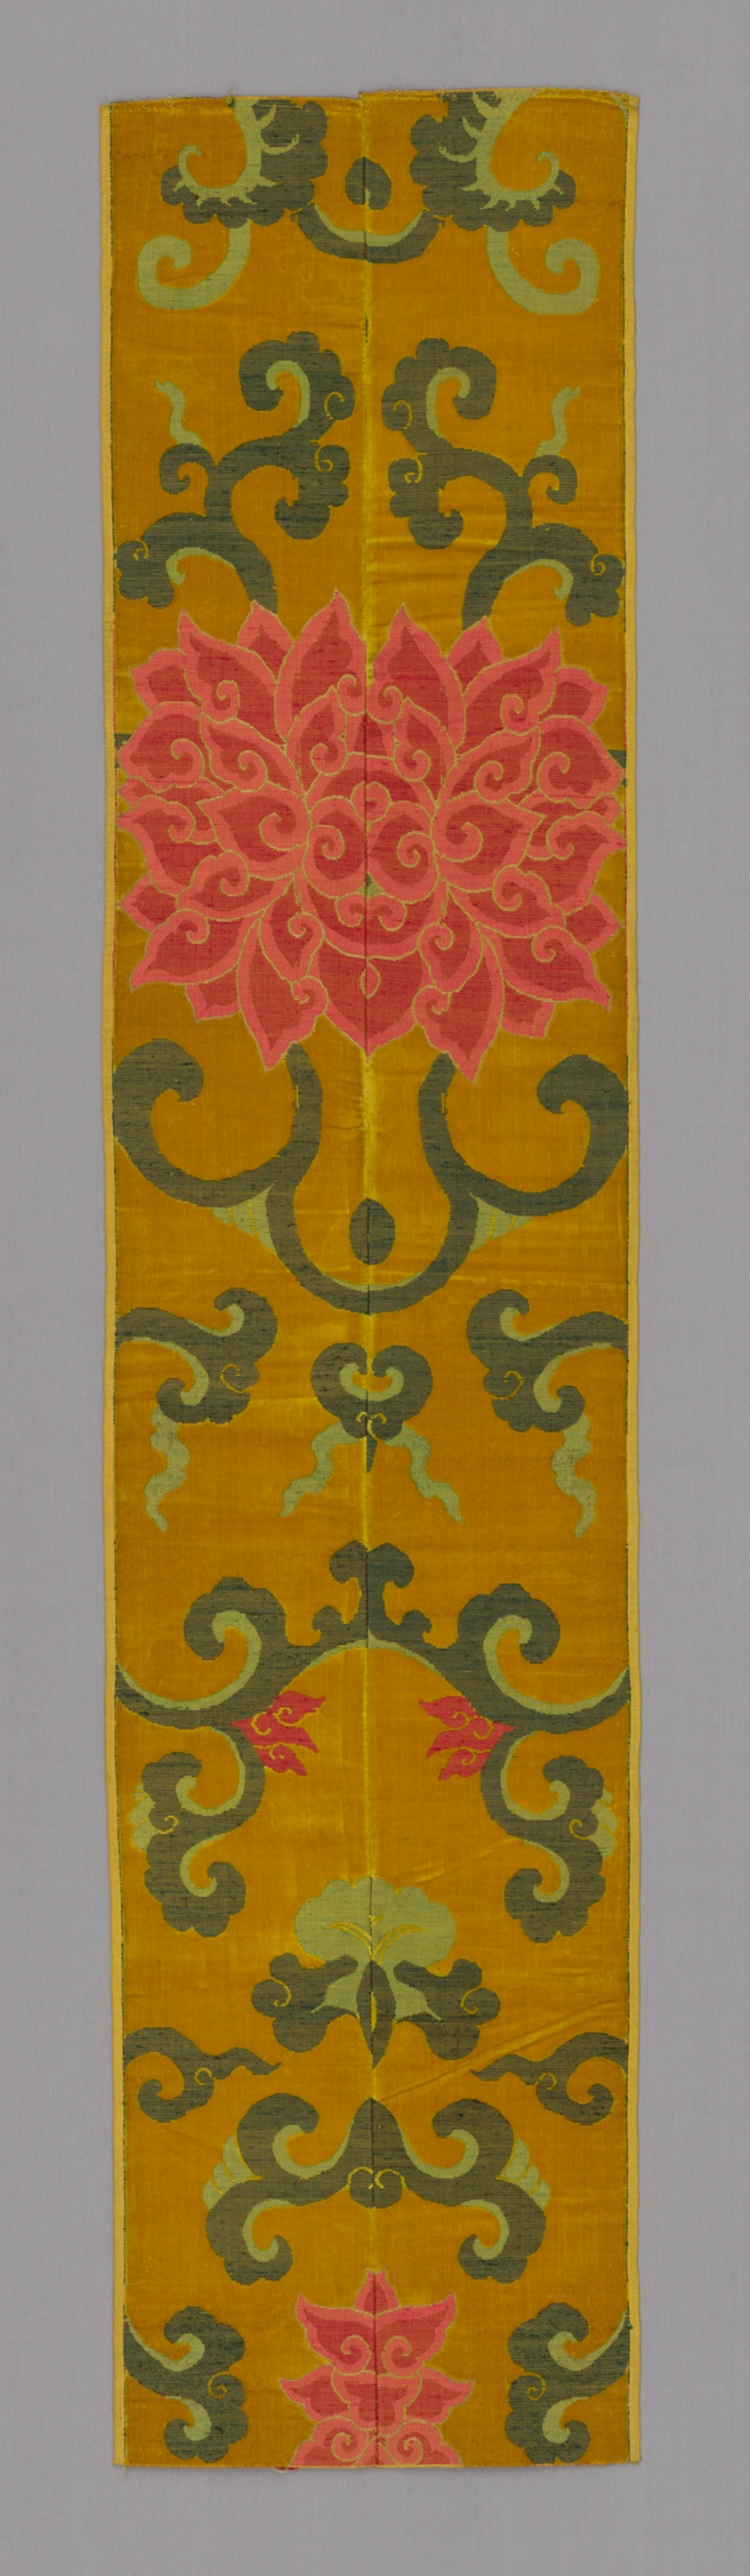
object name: Textile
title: Panel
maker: China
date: 19th century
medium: Cut velvet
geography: China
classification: textile; weaving - velvet; weaving